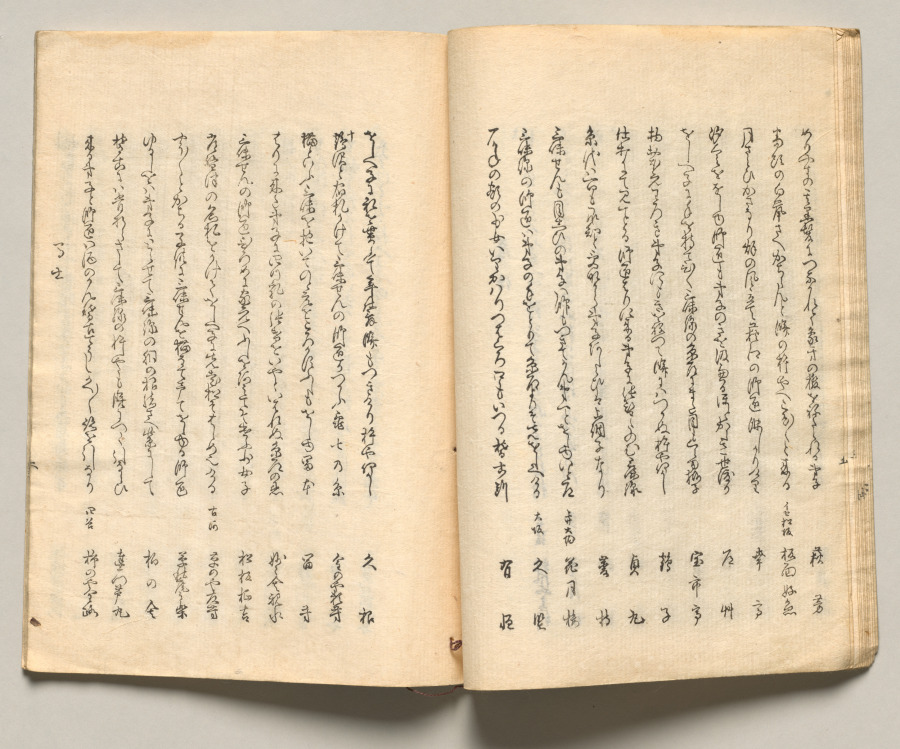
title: Spread Thirteen from Volume Five of People of Japan in Light Verse (Kyōka)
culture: Japan, Edo period (1615–1868)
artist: Utagawa Hiroshige (Japanese, 1797–1858)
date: 1857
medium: Woodblock-printed book; ink and color on paper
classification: Bound Volume